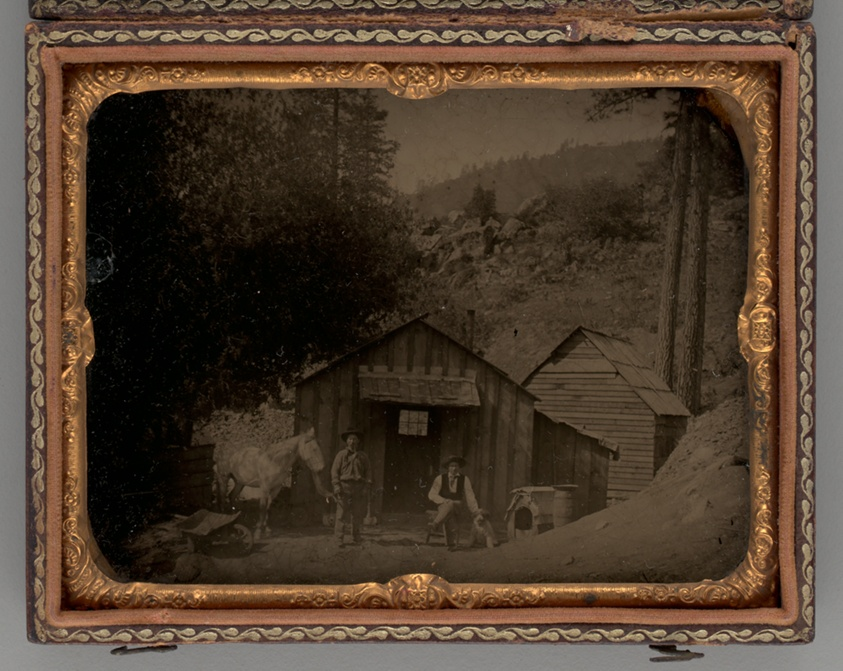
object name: Photograph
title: Untitled (Two Miners in Front of a Shack)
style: 19th century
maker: Unknown maker; American, 19th century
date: 1857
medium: Ambrotype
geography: United States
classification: portrait; ambrotype; portrait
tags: lundberg collection, mines, men, Male, gold rush, gold mining